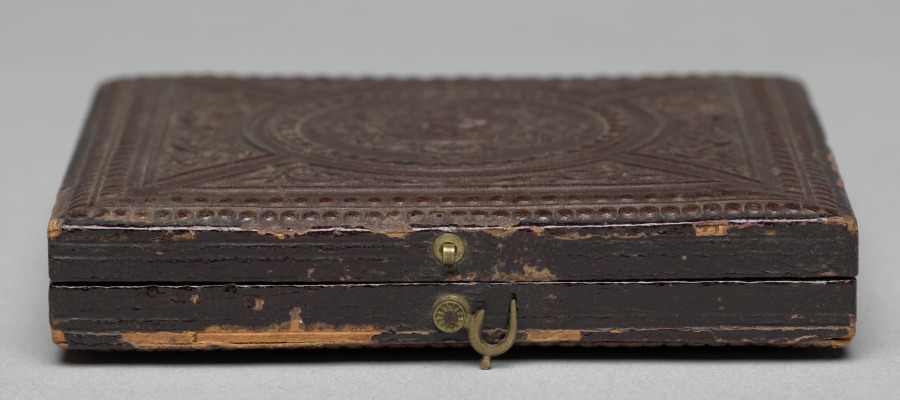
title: Teenage girl with bottle curls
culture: America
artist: Rufus Anson (American, 1820–1900)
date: c. 1855–60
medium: daguerreotype, sixth plate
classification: Photograph